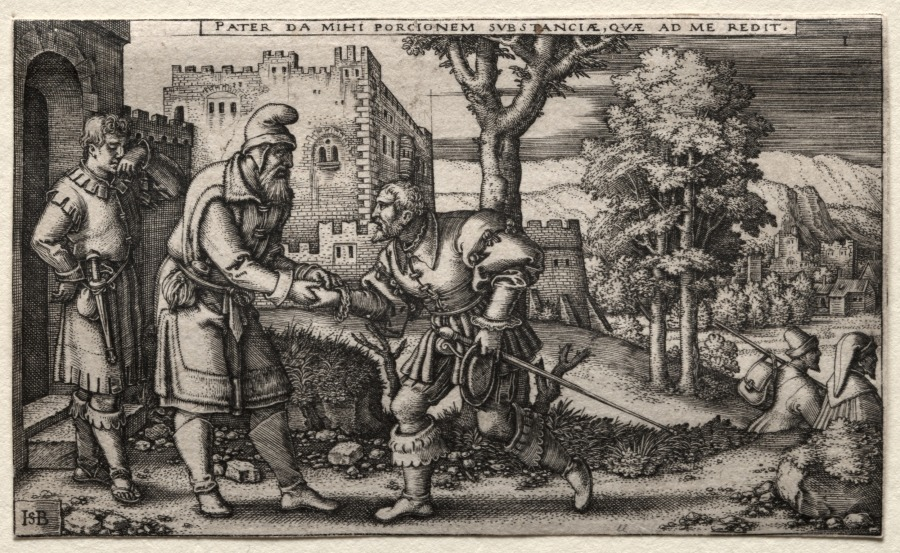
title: The Prodigal Son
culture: Germany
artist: Hans Sebald Beham (German, 1500–1550)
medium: engraving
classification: Print